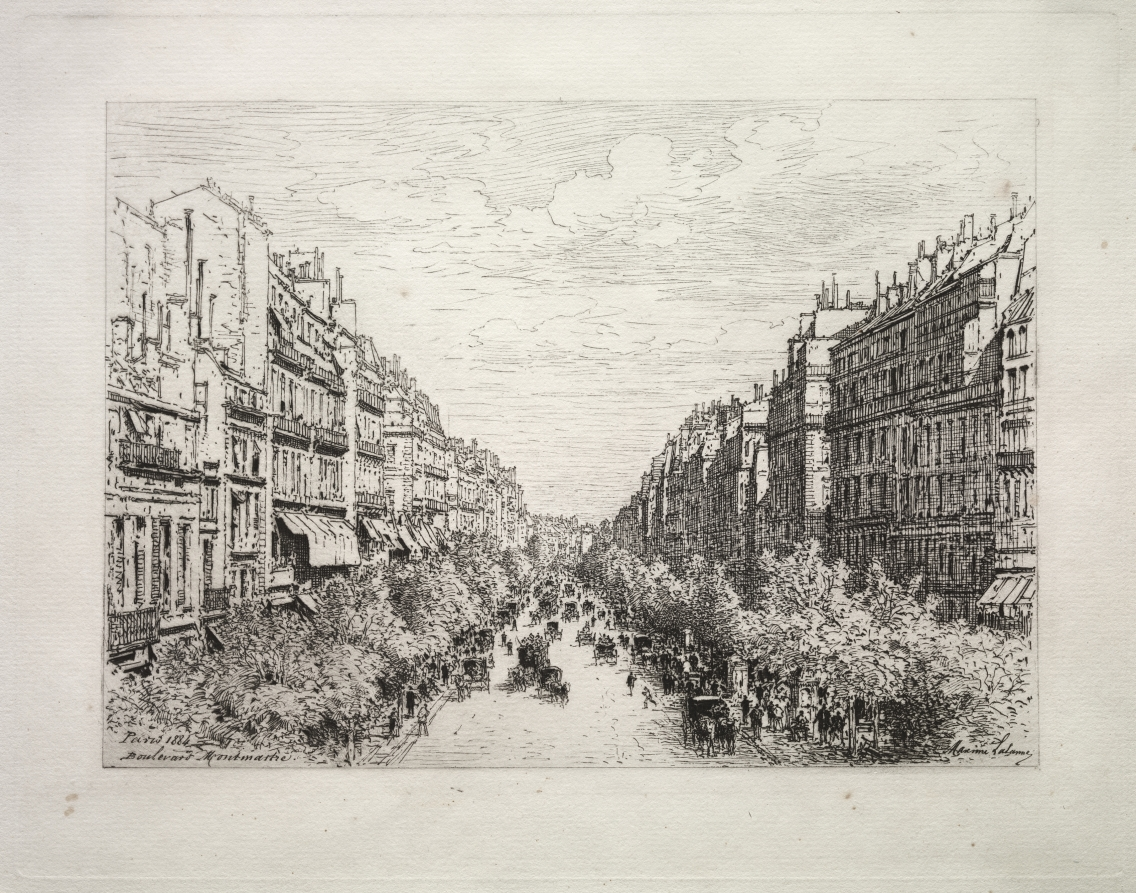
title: Boulevard Montmartre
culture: France, 19th century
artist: Maxime Lalanne (French, 1827–1886)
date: 1884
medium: etching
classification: Print